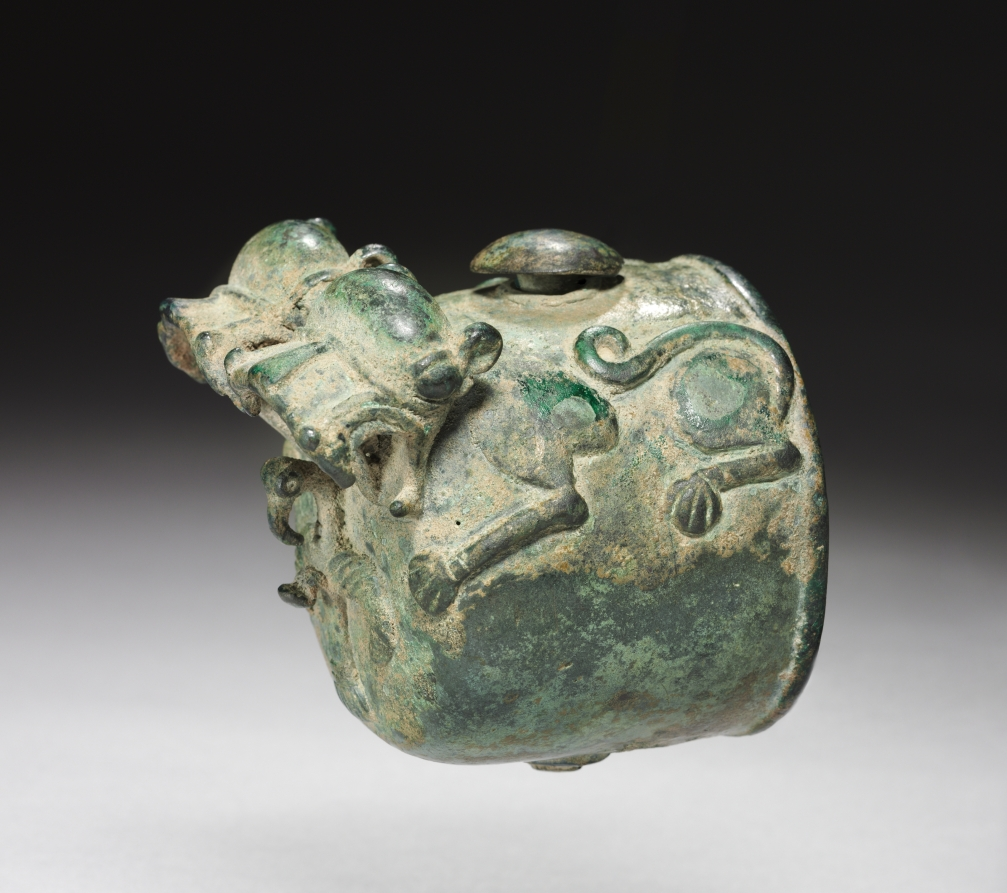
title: Axel Shaft Cup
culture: Iran, Luristan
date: c. 800–700 BCE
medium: bronze, cast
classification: Metalwork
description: Luristan, on Iran's western frontier, and Markik and Amlash in the north were sites of flourishing civilizations. However, since Luristan left little in the way of written records, all that we know about it has been guessed from their works of art. One of the ancient centers of the horse-breeding industry, Luristan is best known for its bronze objects, many of them horse or chariot trappings. Luristan supplied the Assyrian Empire not only with horses but also the hardware associated with them.